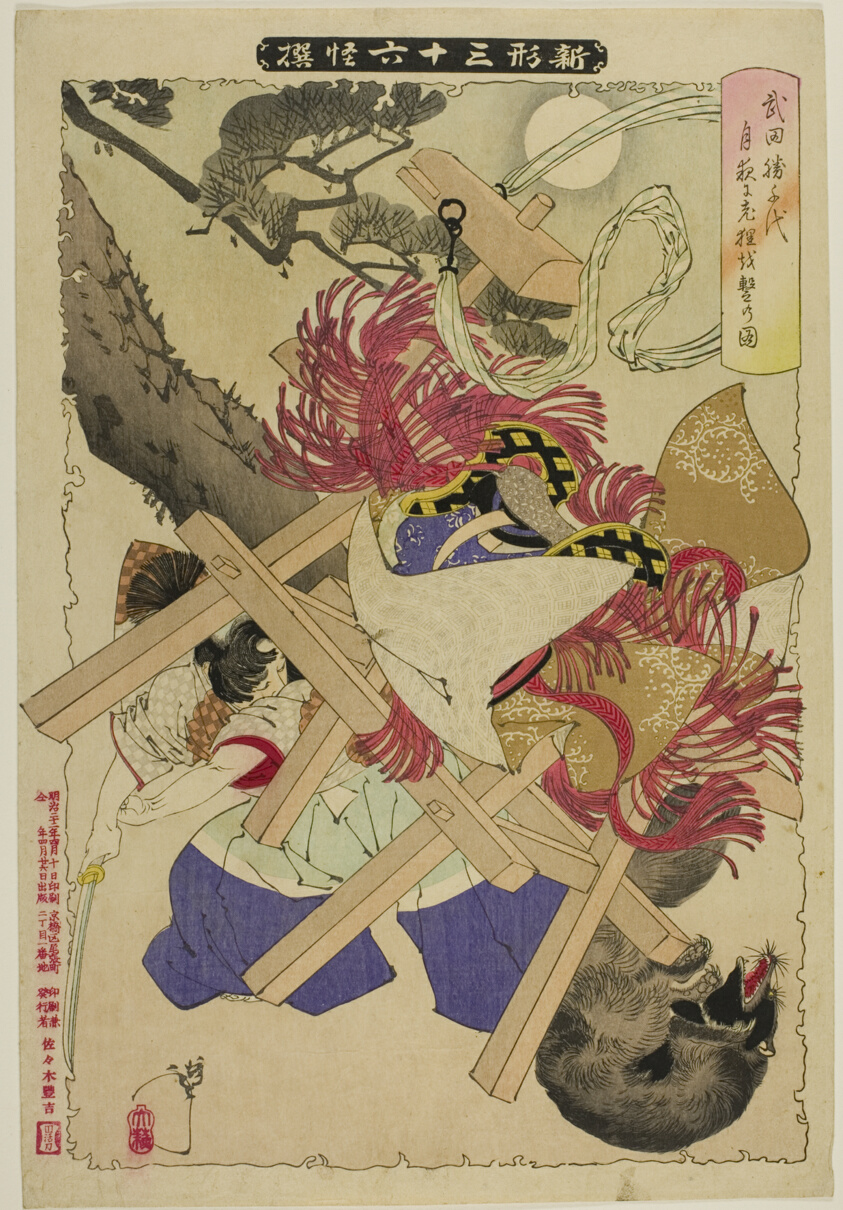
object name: Print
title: The Old Badger from the series "New Forms of Thirty-Six Ghosts"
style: Japanese (culture or style)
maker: Tsukioka Yoshitoshi (Japanese, 1839–1892)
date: 1889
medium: Color woodblock print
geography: Japan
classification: woodblock print; print